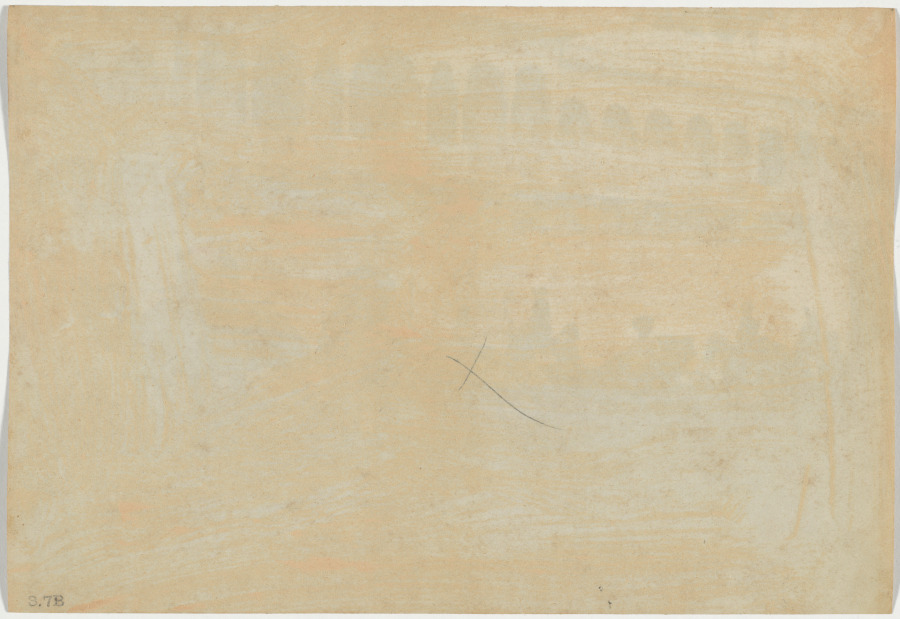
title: Ramkishore Singh of Rewa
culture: India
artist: Raja Deen Dayal (Indian, 1844–1905)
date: 1886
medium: albumen print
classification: Photograph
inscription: Stamped in black ink on verso: “3.7B”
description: Ramkishore Singh, likely a high-ranking official or merchant, is depicted twice in the album, each time aboard a luxurious type of transport. In one photograph, he rides atop an elephant, a creature associated with India, power, and fortitude, preceded by an attendant on horseback. In the other, he rides in a European-style carriage pulled by two horses, flanked by attendants on camels (native to parts of India) and horses. Like the images of Britons in their carriages and rickshaws, these depictions suggest the sitter’s wealth through his possession of servants, animals, and vehicles.